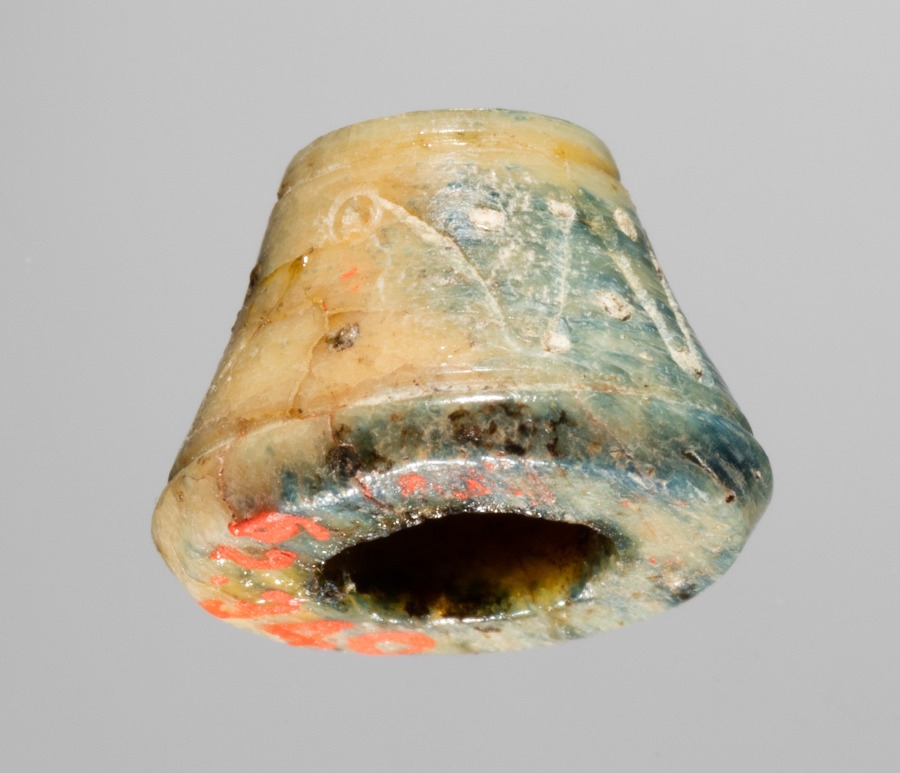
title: Spindle Whorl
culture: Iran, early Islamic period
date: 700s - 900s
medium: bone, incised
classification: Spindle Whorl